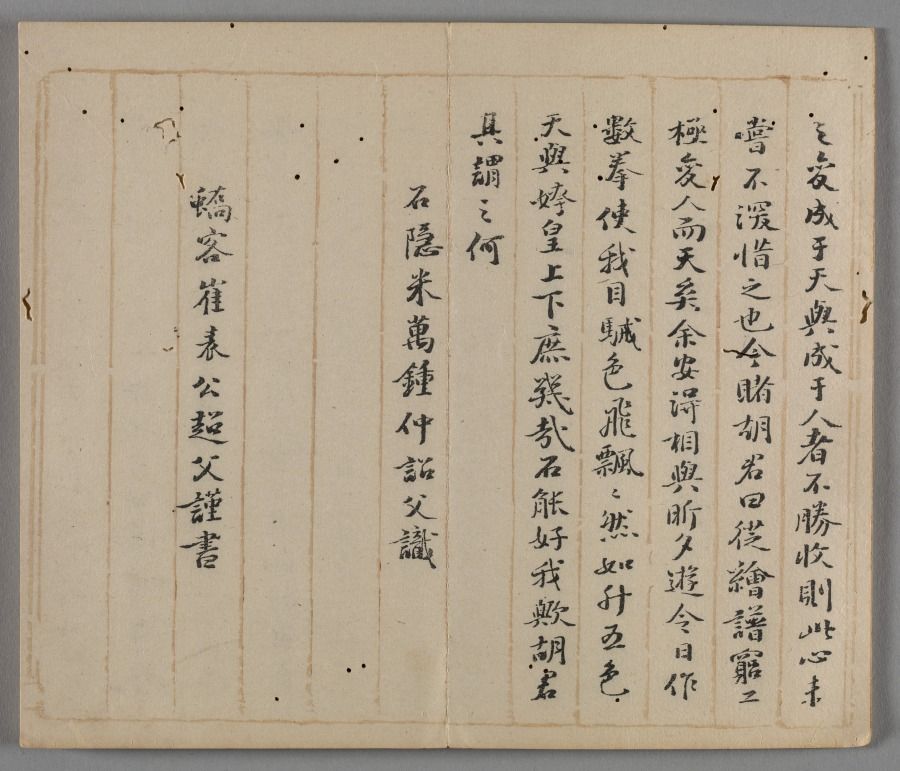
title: Ten Bamboo Studio Painting and Calligraphy Handbook (Shizhuzhai shuhua pu): Rocks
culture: China, Qing dynasty (1644-1911)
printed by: Hu Zhengyan (Chinese, c. 1584–1674)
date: 1633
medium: Woodblock-printed book; ink and colors on paper; first edition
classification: Print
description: Color printing reached a level of perfection in the early 1600s, as seen in this Ten Bamboo Studio Collection of Calligraphy and Painting and the Mustard Seed Garden Manual of Painting (printed 1679 and 1701). The painterly quality, precision in registering (aligning) the woodblocks, and harmonious colors made them the most successful color print editions in Chinese history. Both editions were printed and compiled in Nanjing, spread nationwide, and had a great impact on the arts in Japan and Korea.